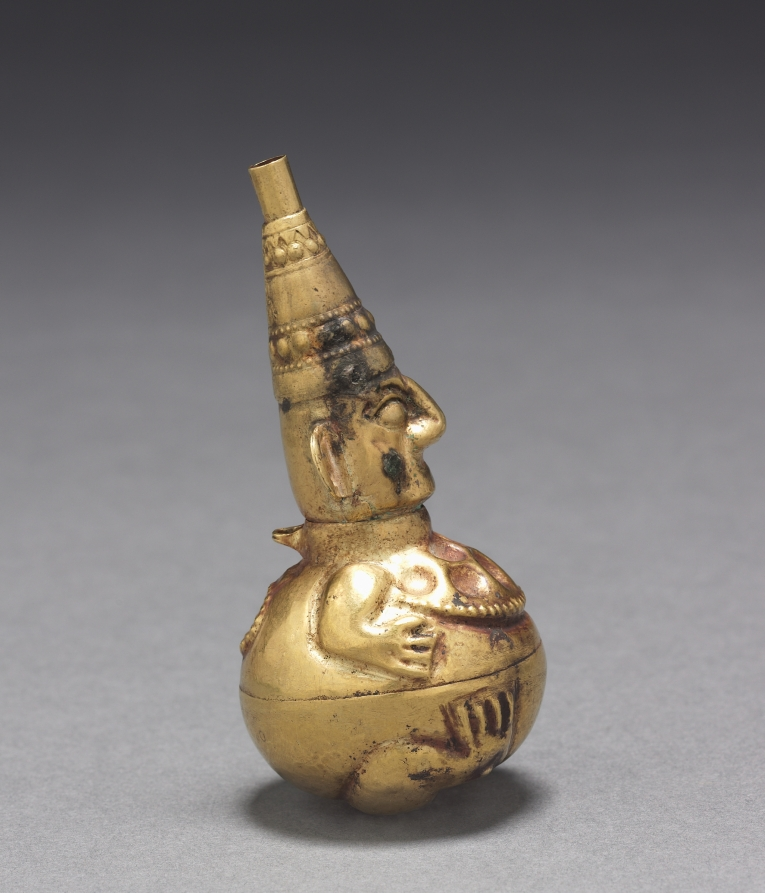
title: Figural Flask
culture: Peru, North Coast, Lambayeque Valley, Sicán or Chimú, 9th-15th Century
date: c. 800–1470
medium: hammered and embossed gold alloy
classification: Metalwork